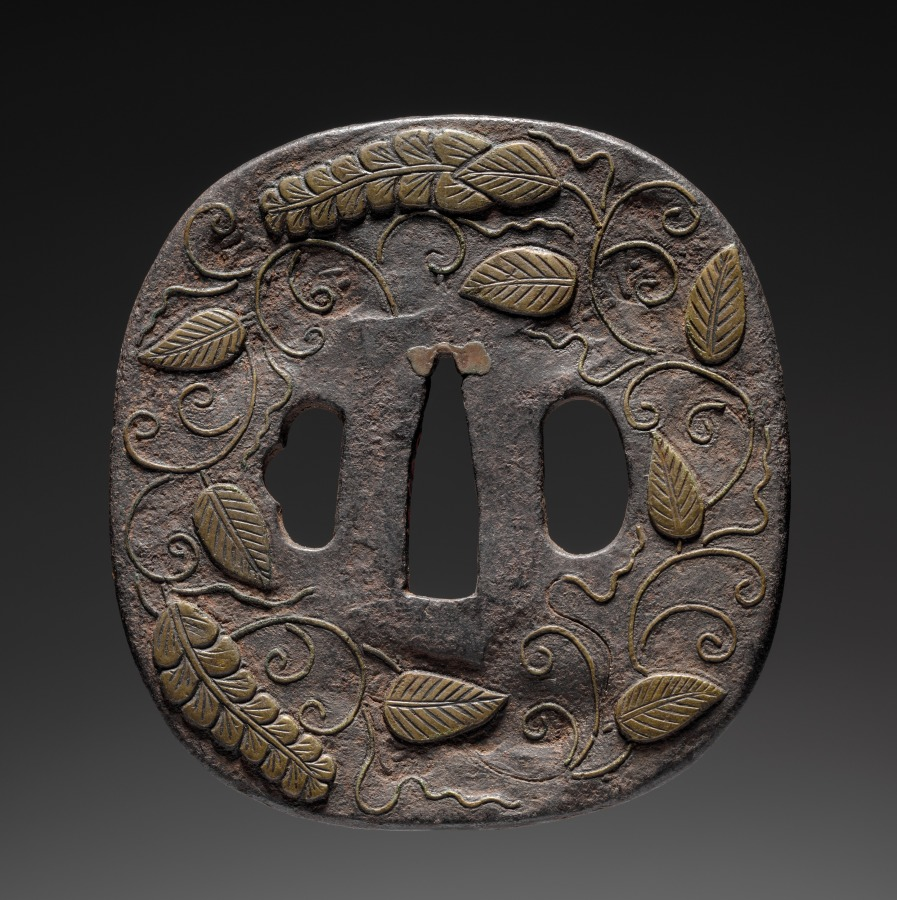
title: Sword Guard (Tsuba)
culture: Japan, possibly Edo period (1615-1868)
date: c. 1615–1868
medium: iron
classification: Arms and Armor